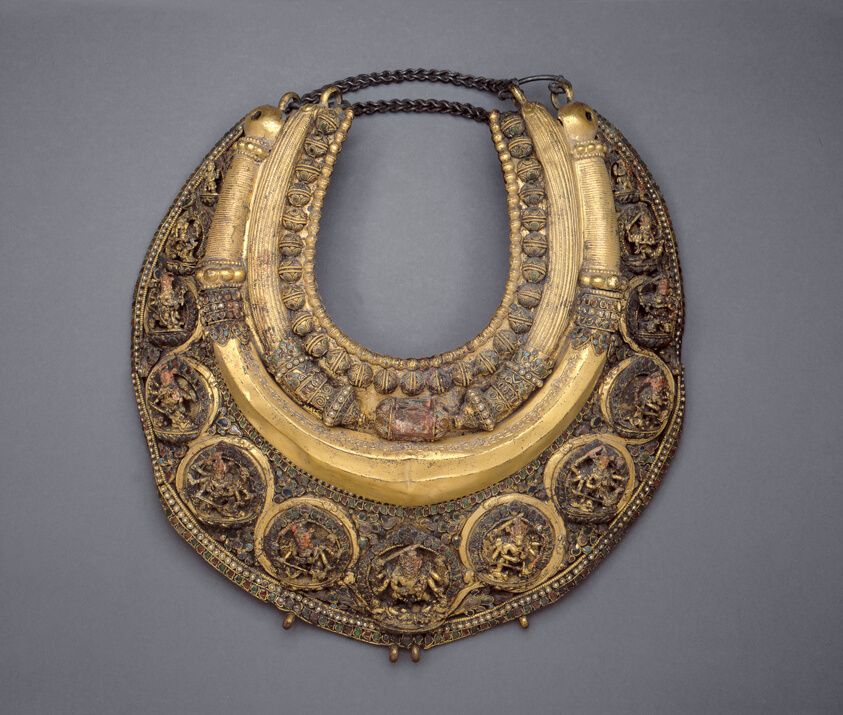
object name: Costume and Accessories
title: Necklace Inscribed with the Name of King Pratapamalladeva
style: Himalayan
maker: Nepal; Kathmandu Valley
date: About 1650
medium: Gilt copper with semiprecious stones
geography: Kathmandu Valley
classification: ceremonial object; jewelry; asian art; costume